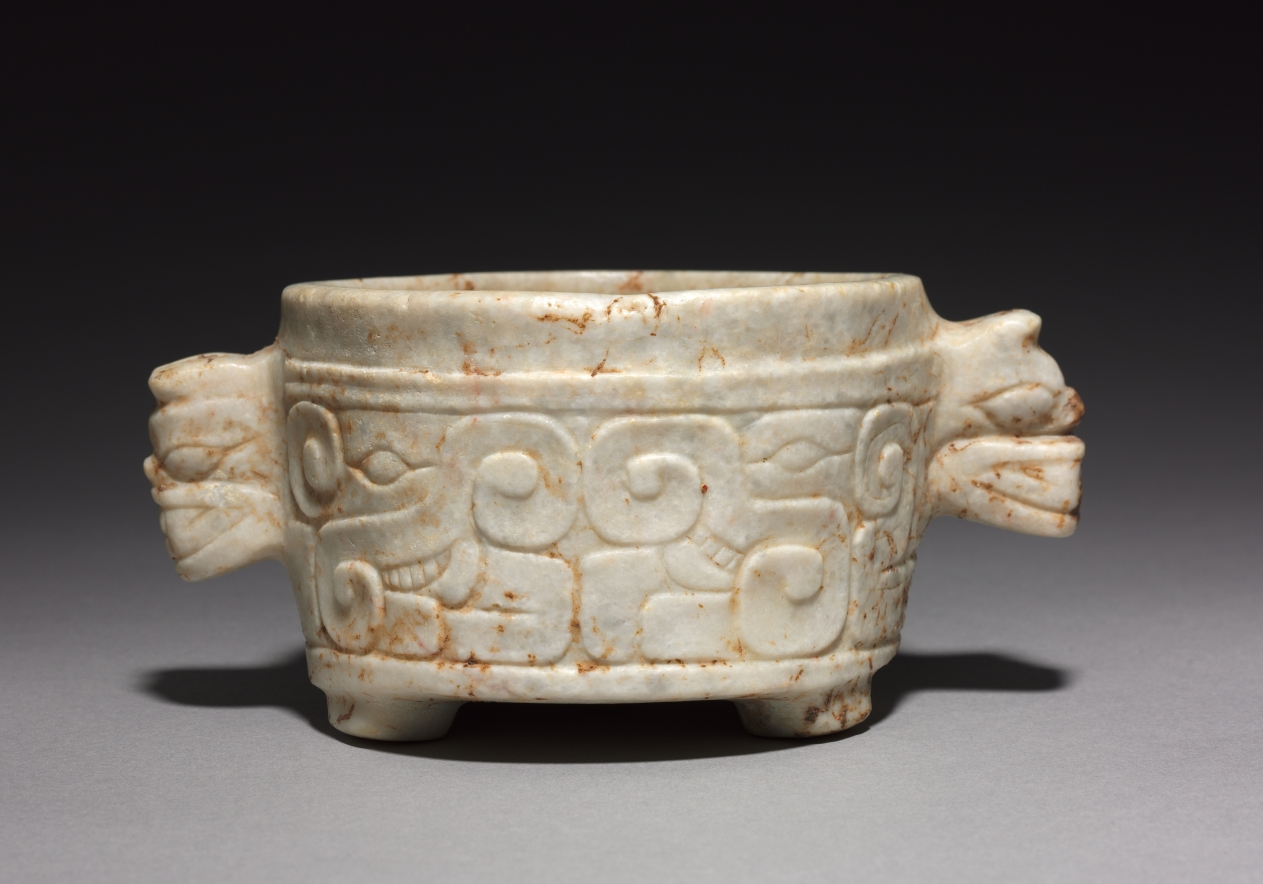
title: Tripod Bowl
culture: Honduras, Ulúa Valley, 7th-10th century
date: 600–1000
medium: marble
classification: Sculpture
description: Between about 600 and 800, white marble vessels carved in dense relief on their outer surfaces were a form of luxury and wealth in the Ulúa region of Honduras. Two confronting profile zoomorphic heads occur on each side of this example, between three-dimensional handles shaped as bat heads. Originally the vessel may have been covered with stucco and brightly painted.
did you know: One of two vessels that were the first ancient American artworks collected by James and Florence Gruener.